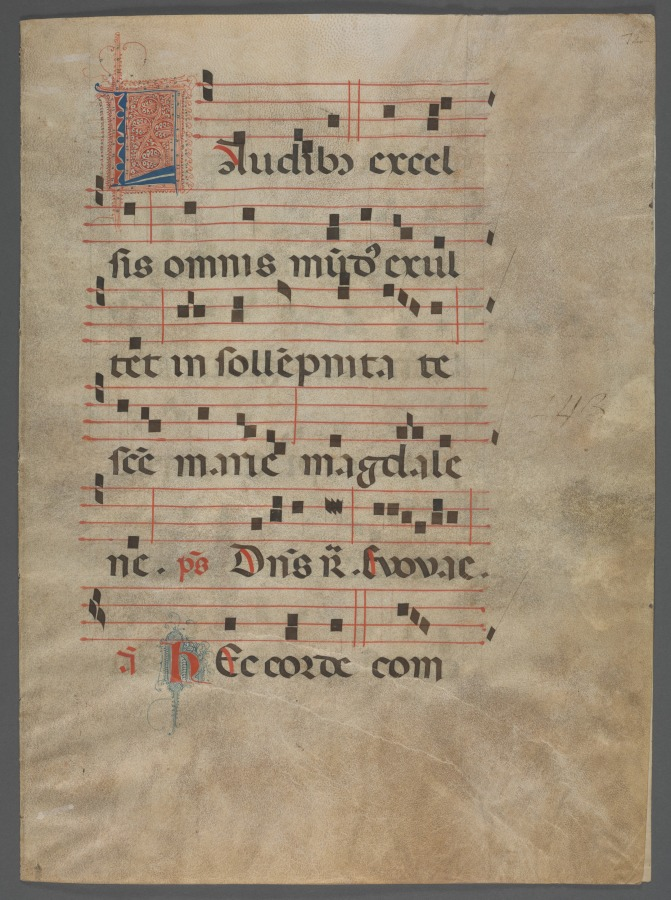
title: Bifolium from an Antiphonary: Initial M with Saint Dominic Preaching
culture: Italy, Bologna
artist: Primo Miniatore di San Domenico (Italian)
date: c. 1320–40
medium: ink, tempera, and gold on parchment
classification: Manuscript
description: The representation of Saint Dominic (1170–1221), founder of the Dominican Order of Preachers, in this initial suggests that this double page was at one time part of a manuscript made for a Dominican convent. Saint Dominic traveled much, preaching throughout Europe, and was particularly venerated in Bologna, the city in which he died and was buried. The illuminator of this initial is named after a volume he decorated of Seneca’s works (now in the Bibliothèque nationale in Paris). His workshop specialized in large-scale manuscripts destined for wealthy religious institutions in the region of Emilia, for which Bologna was the artistic and intellectual center.